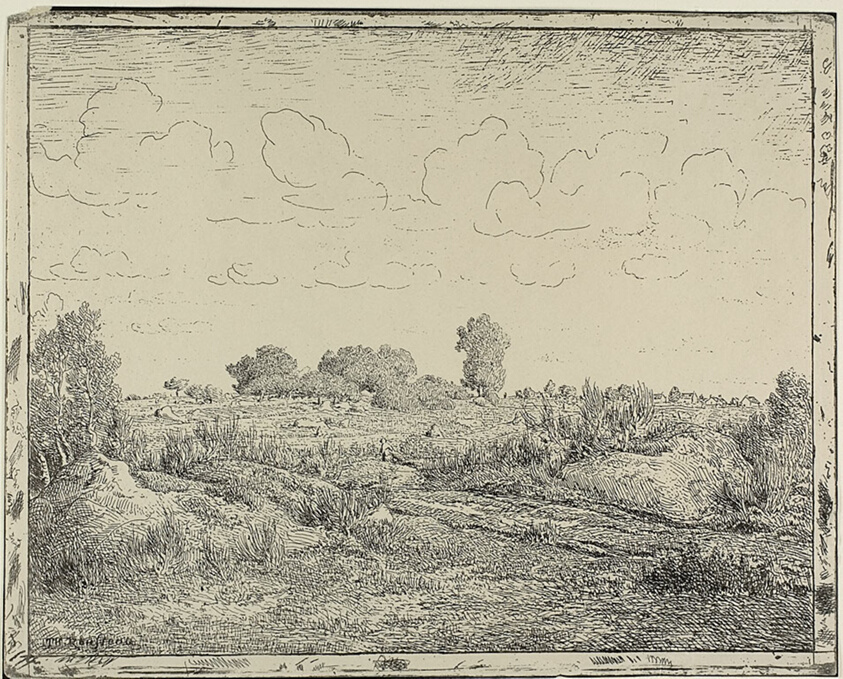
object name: Print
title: Plain at Plante à Biau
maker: Théodore Rousseau (French, 1812-1867)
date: 1862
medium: Cliché-verre on cream wove paper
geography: France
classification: cliché-verre; print; prints and drawing